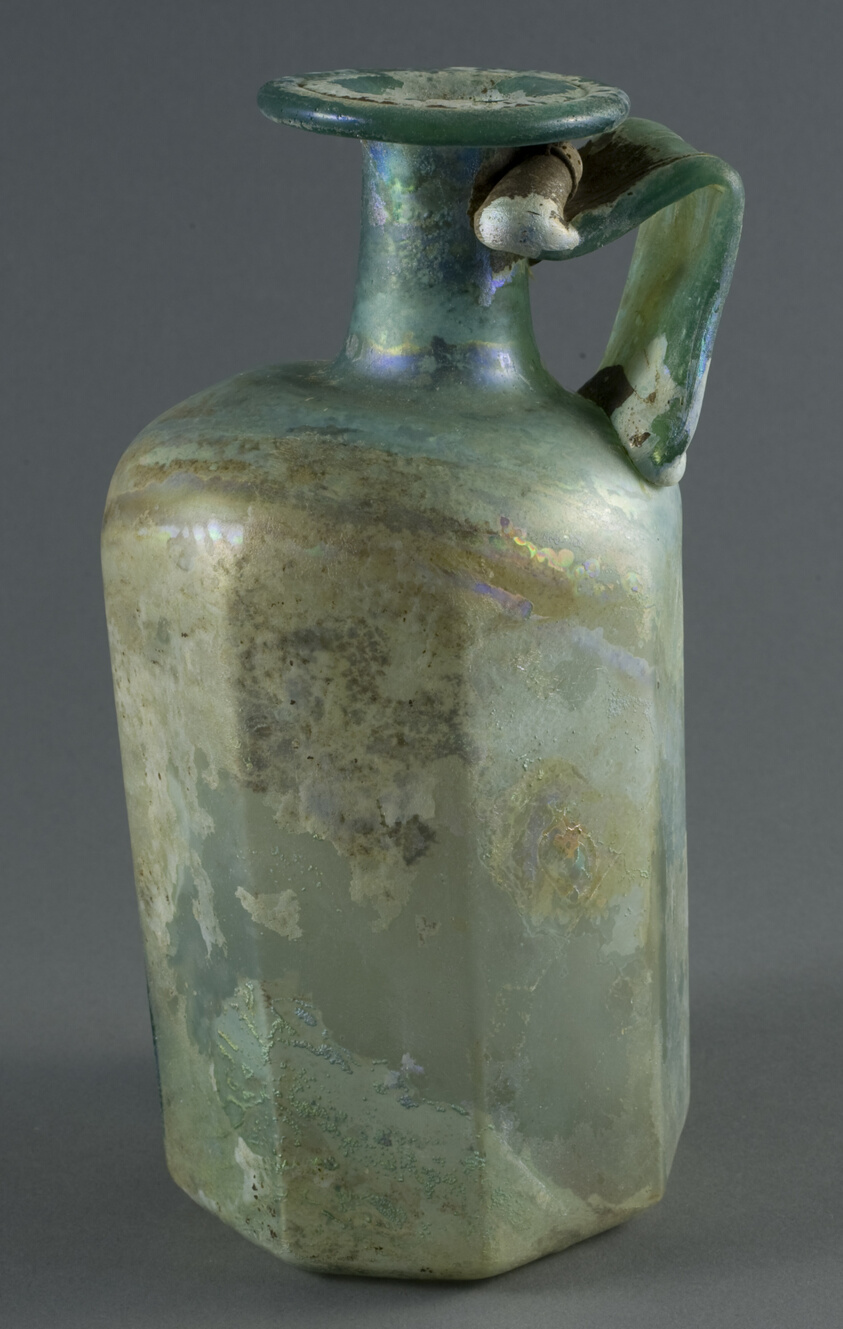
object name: Vessel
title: Flask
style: syrian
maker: Roman; Levant or Syria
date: 2nd century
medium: Glass, blown technique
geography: Syria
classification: glass; vessel; ancient art